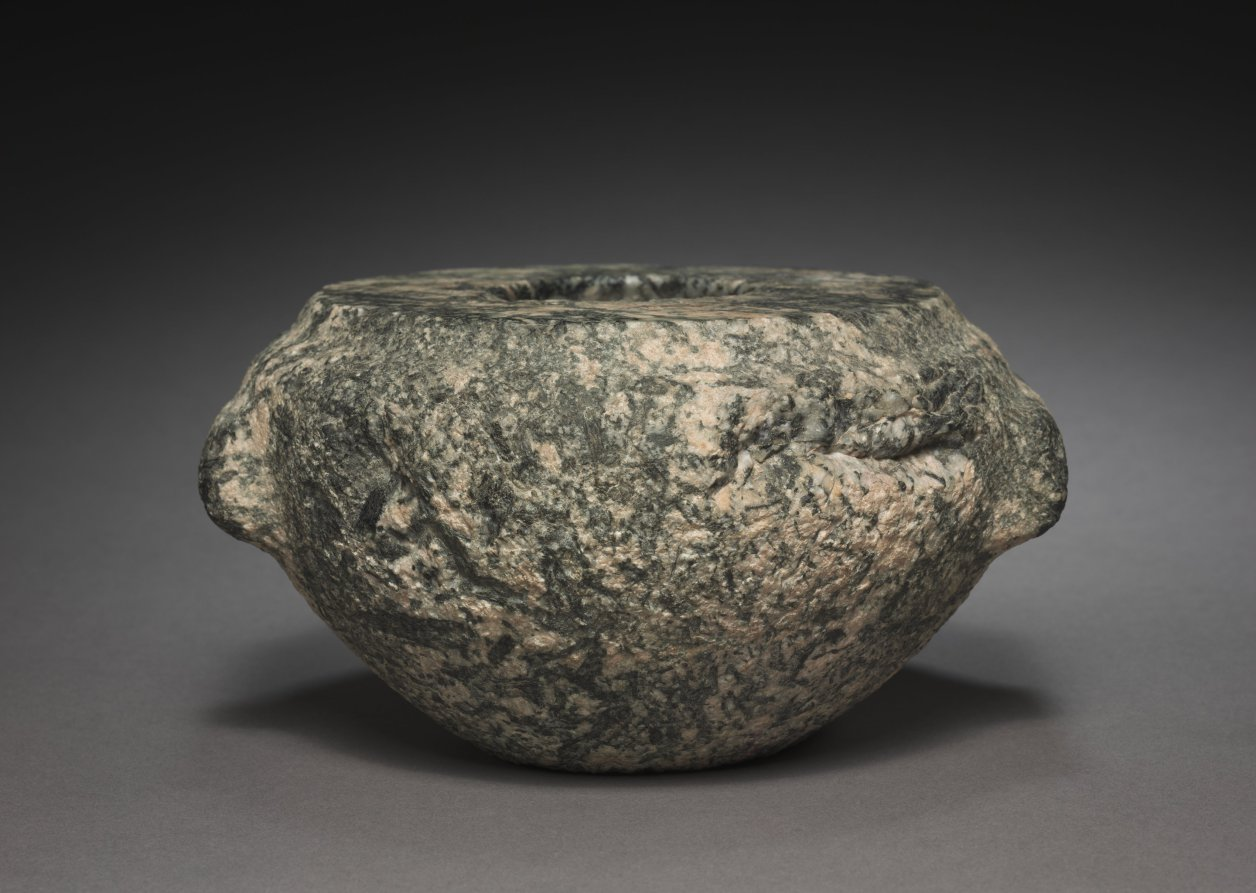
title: Squat Dummy Jar with Lug Handles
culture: Egypt, probably Saqqara, north of the Step Pyramid, tomb 2347, excavations of J. E. Quibell, 1910-1911, Early Dynastic (2950–2647 BCE), Dynasties 2–3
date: 2700–2573 BCE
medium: hornblende diorite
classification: Vessels